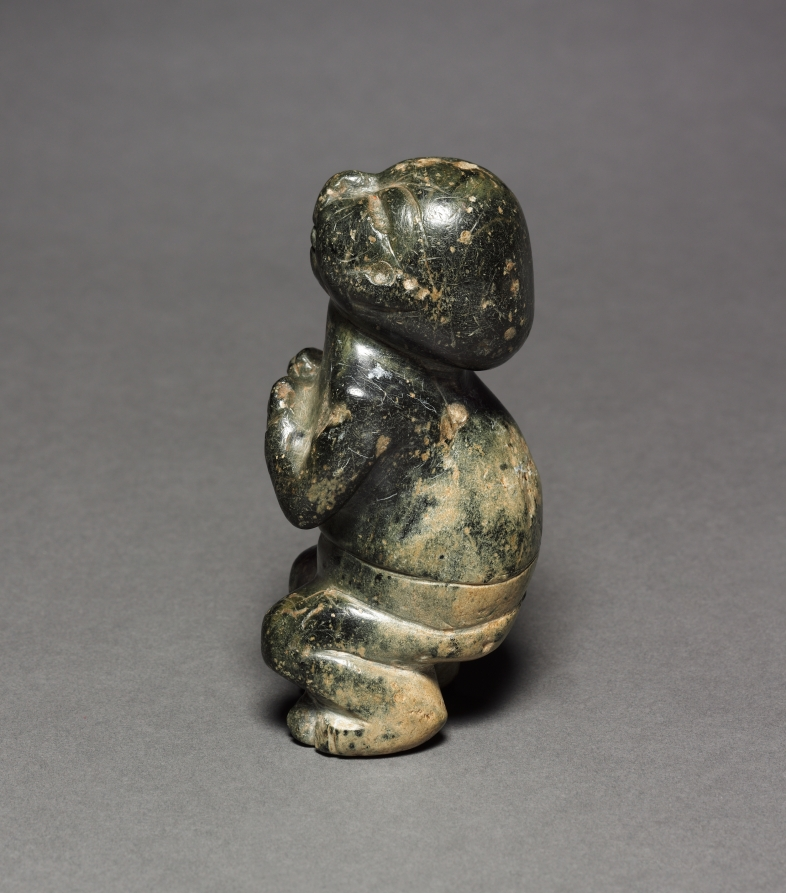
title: Crouching Figure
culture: Mexico, Guerrero, Olmec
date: 900–300 BCE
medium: serpentine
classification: Sculpture